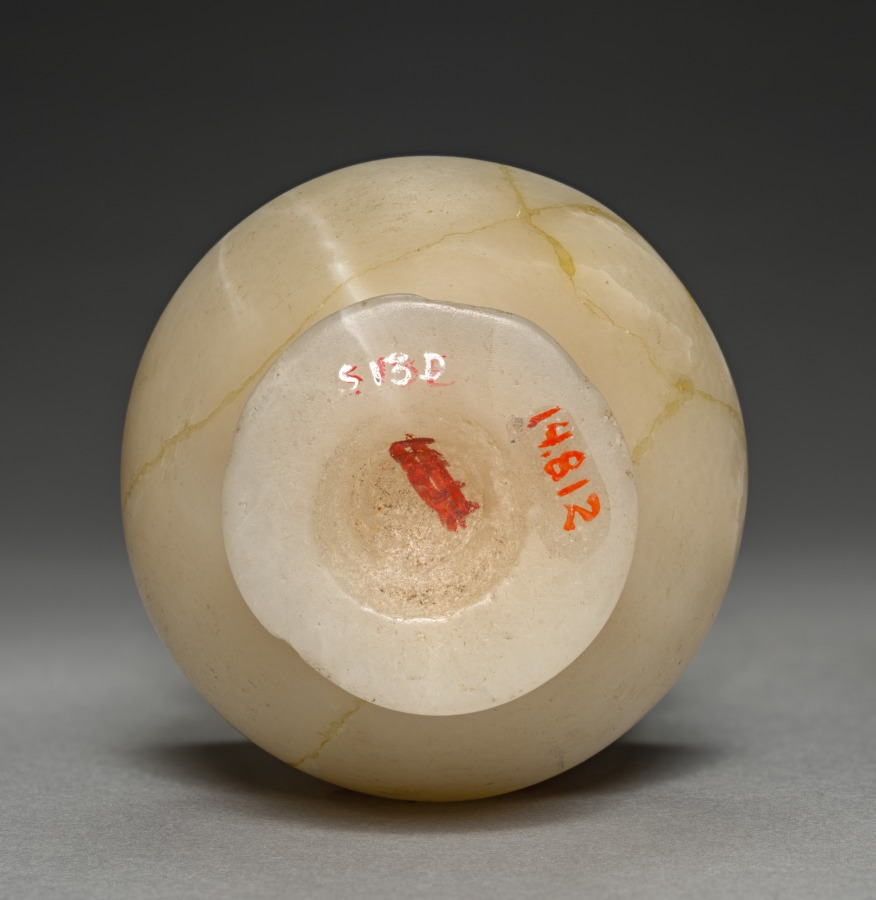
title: Long-Necked Flask (Krateriskos)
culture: Egypt, New Kingdom (1540–1069 BCE), Dynasty 18, reign of Tuthmosis III (1479–1425 BCE)–reign of Amenhotep III (1390–1352 BCE)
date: 1540–1296 BCE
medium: travertine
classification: Vessels